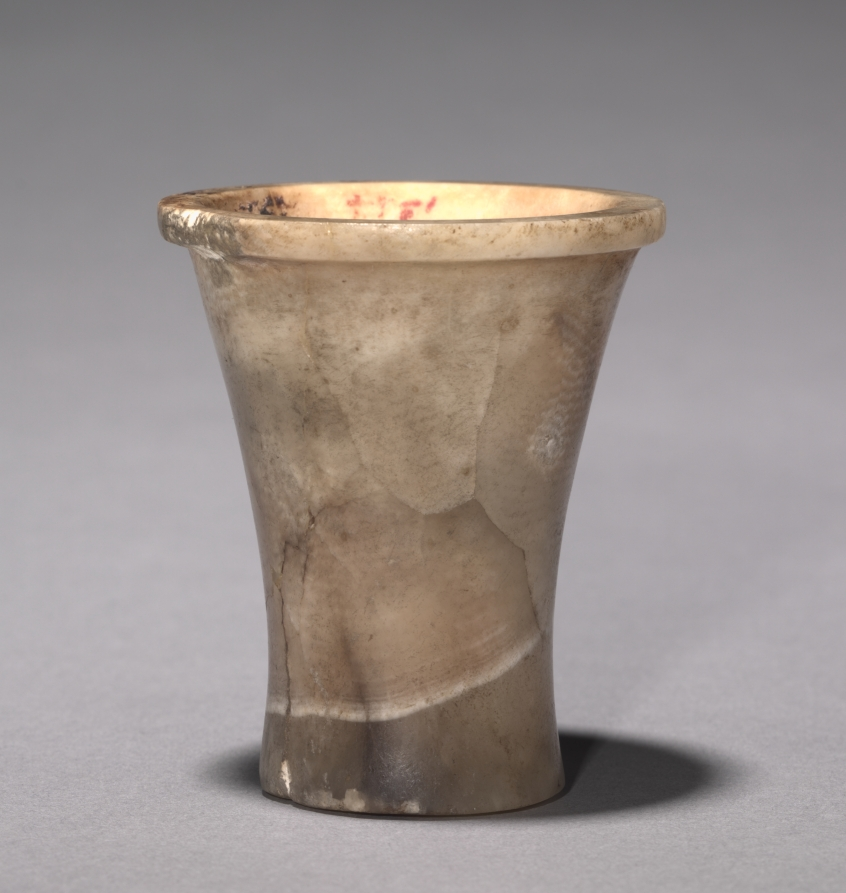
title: Cosmetic Vessel (Cylinder Beaker)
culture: Egypt, Middle Kingdom (2040–1648 BCE), Dynasty 12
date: 1980–1801 BCE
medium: travertine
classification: Vessels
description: Jars of this shape and material are common in Middle Kingdom tombs. This one, however, is inscribed with the Egyptian word merhet, which means "perfumed oil," and after thousands of years it still has traces of sweet-smelling resin.